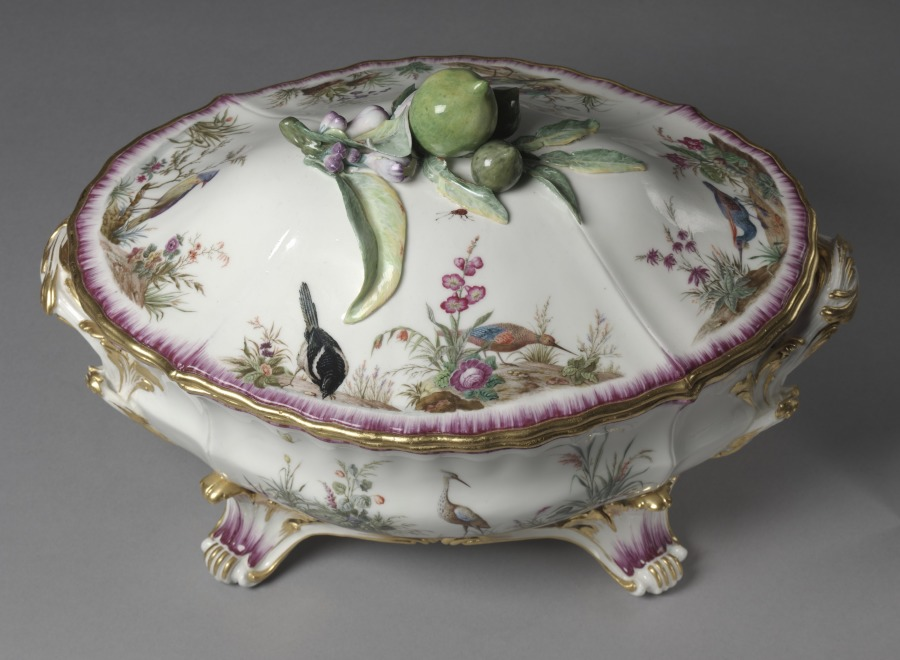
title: Covered Tureen (Terrine ancienne or Terrine ordinaire)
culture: France, Vincennes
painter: attributed to Louis-Denis Armand (French, active c. 1745–1783)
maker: Vincennes Porcelain Factory (France, 1740–56)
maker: probably by Jean-Claude Duplessis le Père (French, 1690–1774)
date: c. 1752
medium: soft-paste porcelain with enamel and gilt decoration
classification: Ceramic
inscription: [Interlaced foliate 'L's surmounted by a fleur-de-lys (indicating royal commision), in blue]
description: The intricately painted birds that decorate this tureen are the work of Louis-Denis Armand. Armand was known for his depictions of birds and landscapes, a specialty that may have come from his work as a painter of lacquered furniture with similar compositions. This tureen was likely designed by master goldsmith Jean-Claude Duplessis who began working as an artistic director at the Vincennes Porcelain Factory in 1748.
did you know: This object was manufactured in soft-paste porcelain, a material used by many European porcelain factories before they were able to emulate the hard-paste porcelain of China and Japan.